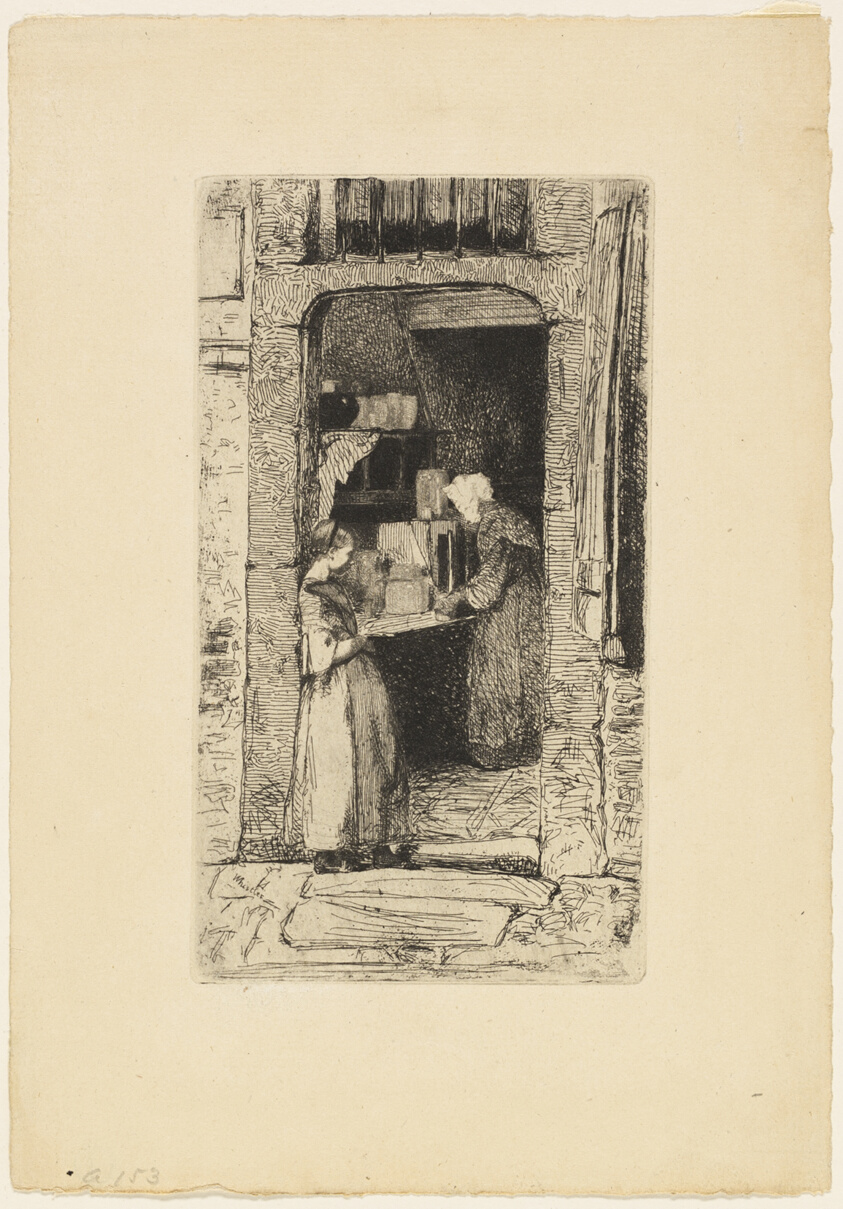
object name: Print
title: La Marchande de Moutarde (The Mustard Seller)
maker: James McNeill Whistler (American, 1834-1903)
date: 1858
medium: Etching with foul biting in black ink on cream laid paper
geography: United States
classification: etching; foul biting; print; prints and drawing; paper